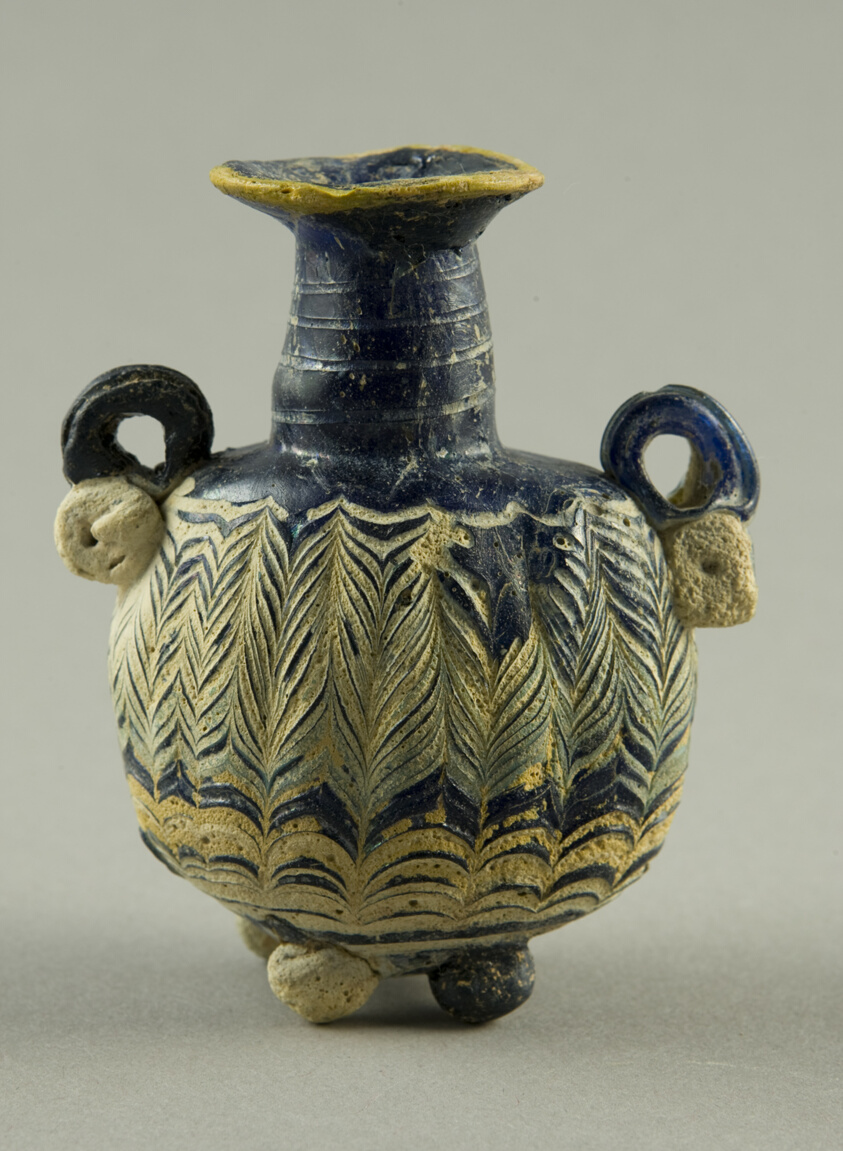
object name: Vessel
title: Flask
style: ancient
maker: Eastern Mediterranean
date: 4th century BCE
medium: Glass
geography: Egypt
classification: glass; vessel; ancient art